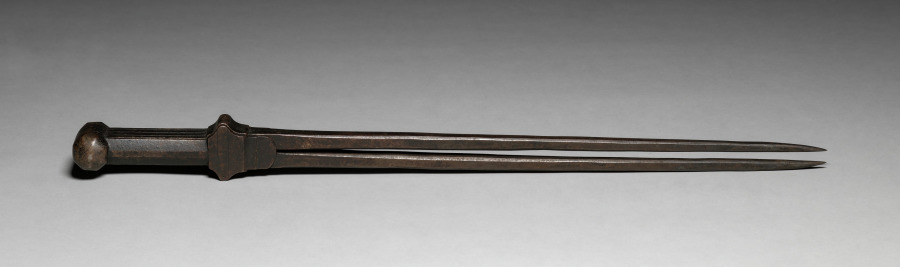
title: Dividers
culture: Germany (?)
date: 1500s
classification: Tool